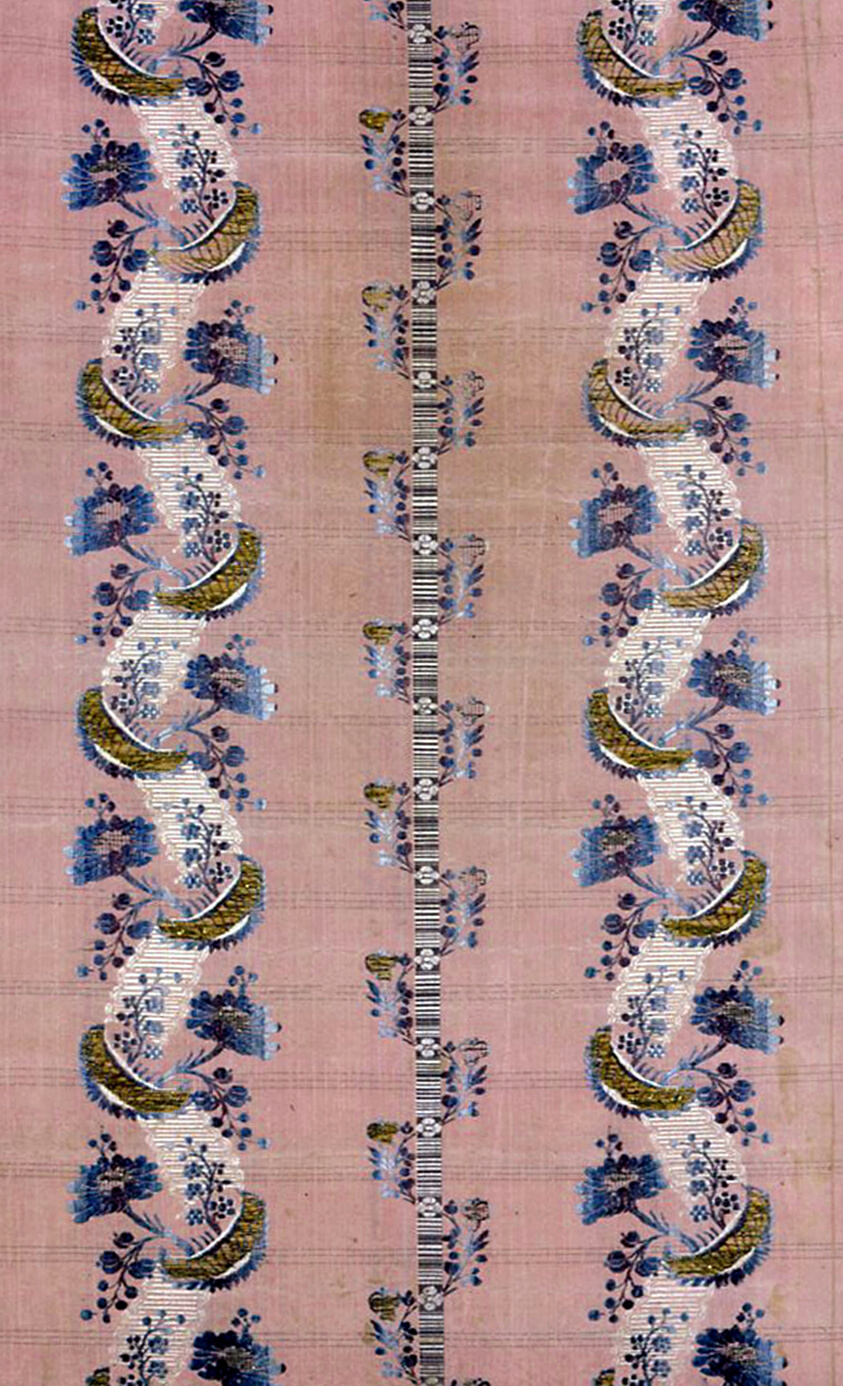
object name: Textile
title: Panel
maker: England or France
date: c. 1749/55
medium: Silk and gilt-metal strips, warp-stripe plain weave with supplementary patterning wefts, supplementary brocading wefts, and supplementary patterning warps bound by secondary binding wefts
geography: England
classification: textile; weaving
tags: flowers, lace